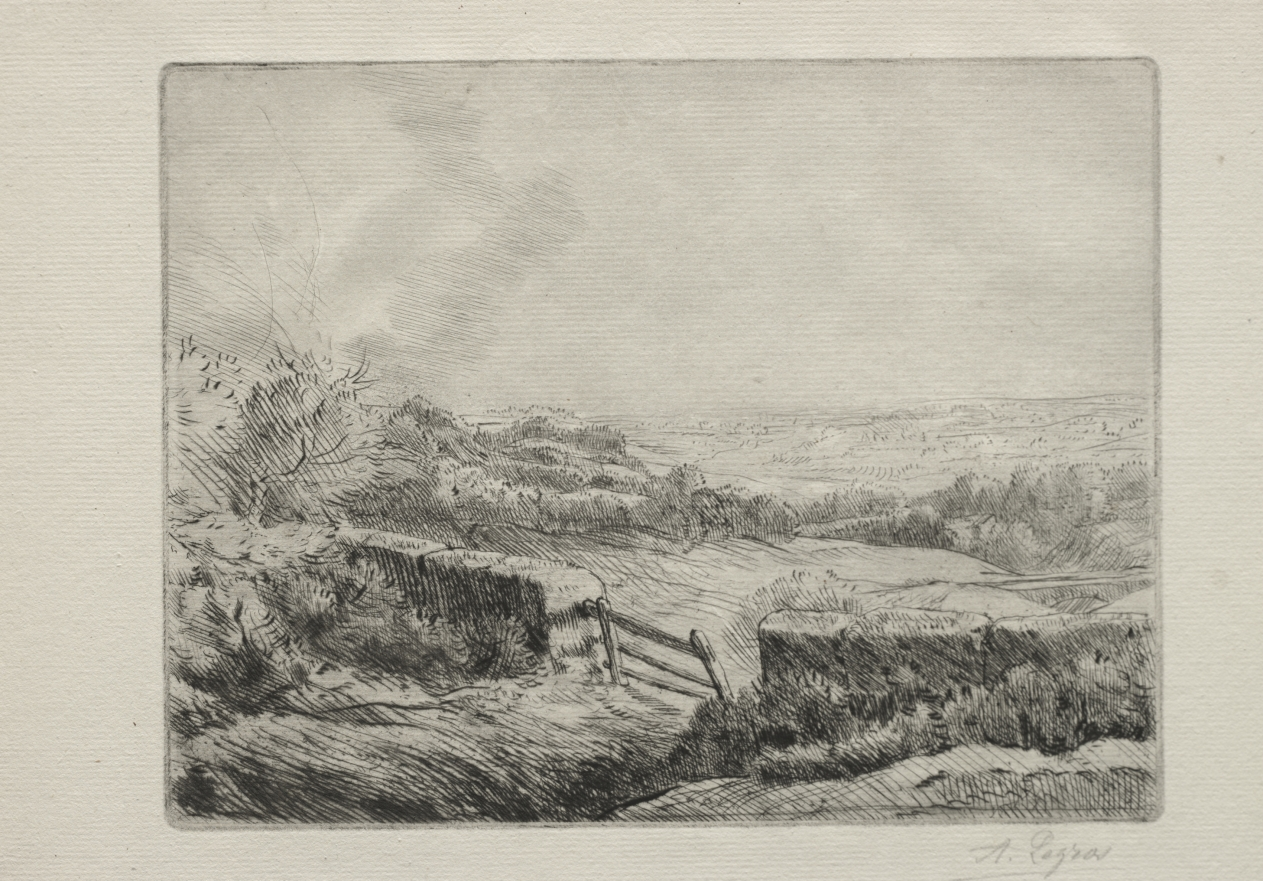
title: Entrance to the Field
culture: France, 19th-20th century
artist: Alphonse Legros (French, 1837–1911)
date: c. 1857–1911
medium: etching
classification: Print